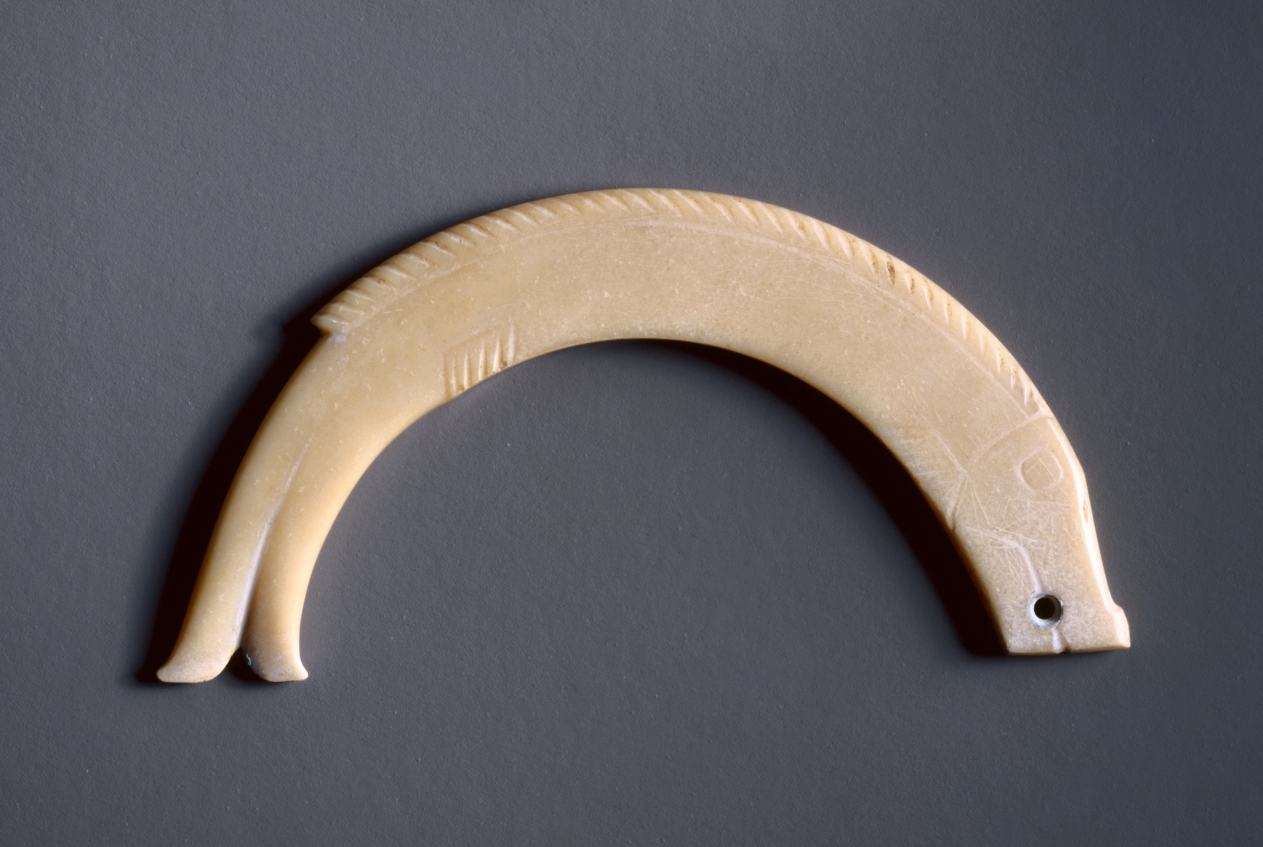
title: Arc-Shaped Jade Fish Pendant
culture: China, Western Zhou dynasty (c. 1046–771 BCE)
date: c. 1050–900 BCE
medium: nephrite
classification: Jade